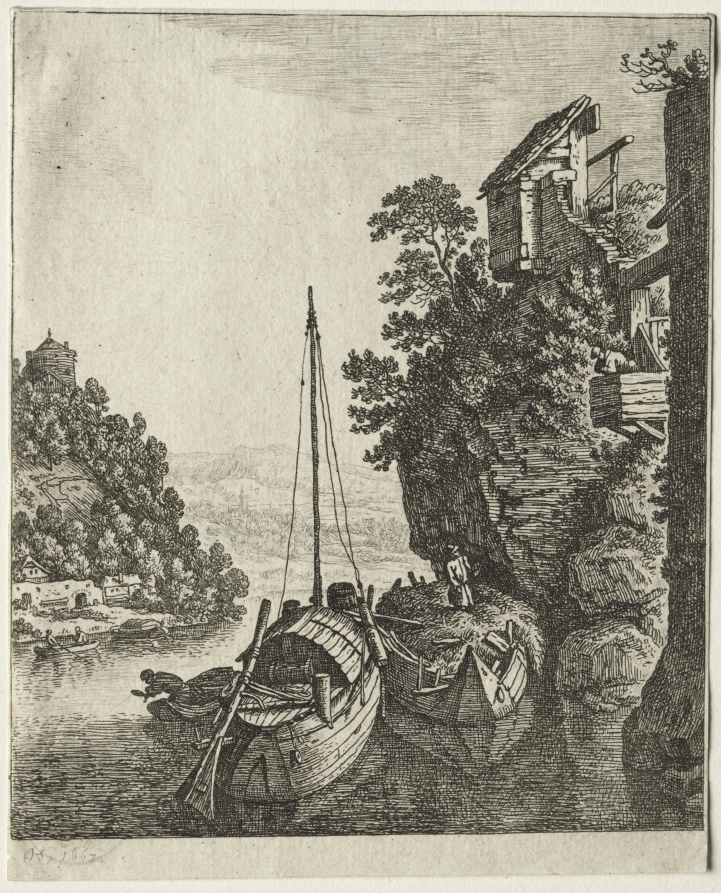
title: Two Boats moored under a rock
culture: Netherlands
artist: Herman Saftleven (Dutch, 1609–1685)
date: 1667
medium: etching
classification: Print